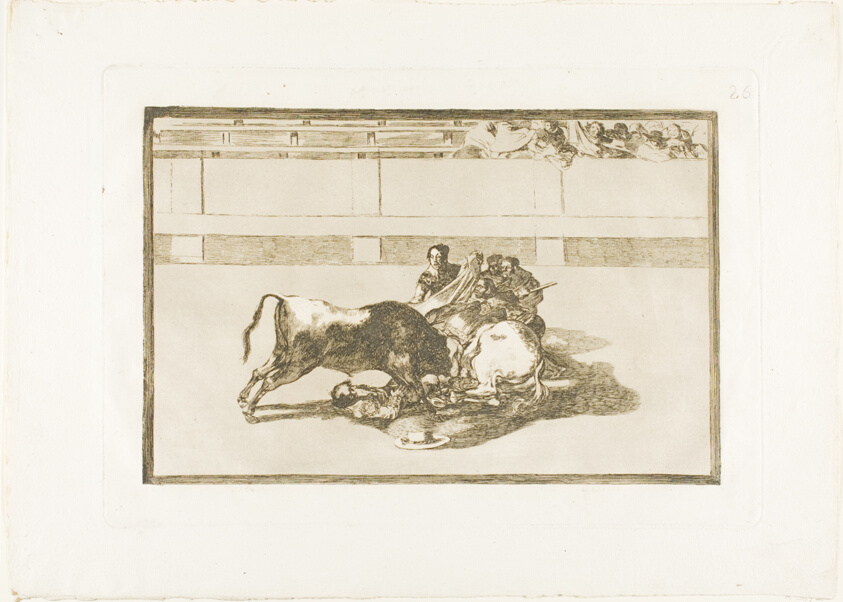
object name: Print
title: A Picador is Unhorsed and Falls under the Bull, plate 26 from The Art of Bullfighting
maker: Francisco José de Goya y Lucientes (Spanish, 1746-1828)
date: 1814/16, published 1816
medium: Etching, burnished aquatint and drypoint on ivory laid paper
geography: Spain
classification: etching; print; prints and drawing